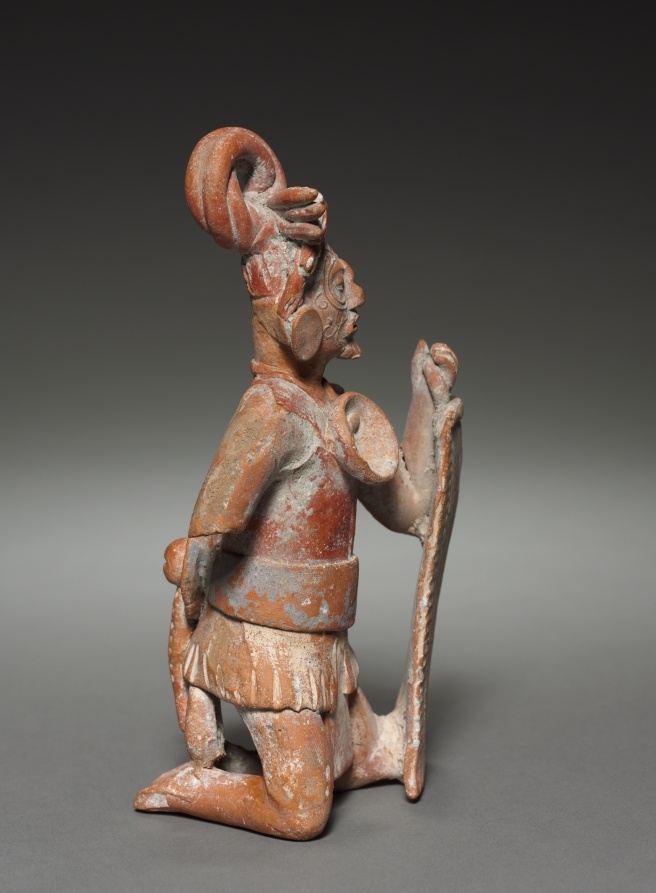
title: Warrior Figurine with Shield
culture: Mexico, Classic Maya, Jaina style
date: 600–900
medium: molded and modeled pottery with traces of pigment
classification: Sculpture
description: Maya figurines portray a wide range of human, animals, and supernatural beings. This example represents a kneeling warrior who holds a rectangular shield and wears elaborate ornaments, including huge ear spools. The expressive, delicate head was made in a mold; the body was hand modeled.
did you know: Elaborate facial tattoos and a bivalve pendent identify this warrior as a sajal, a second-tier noble.